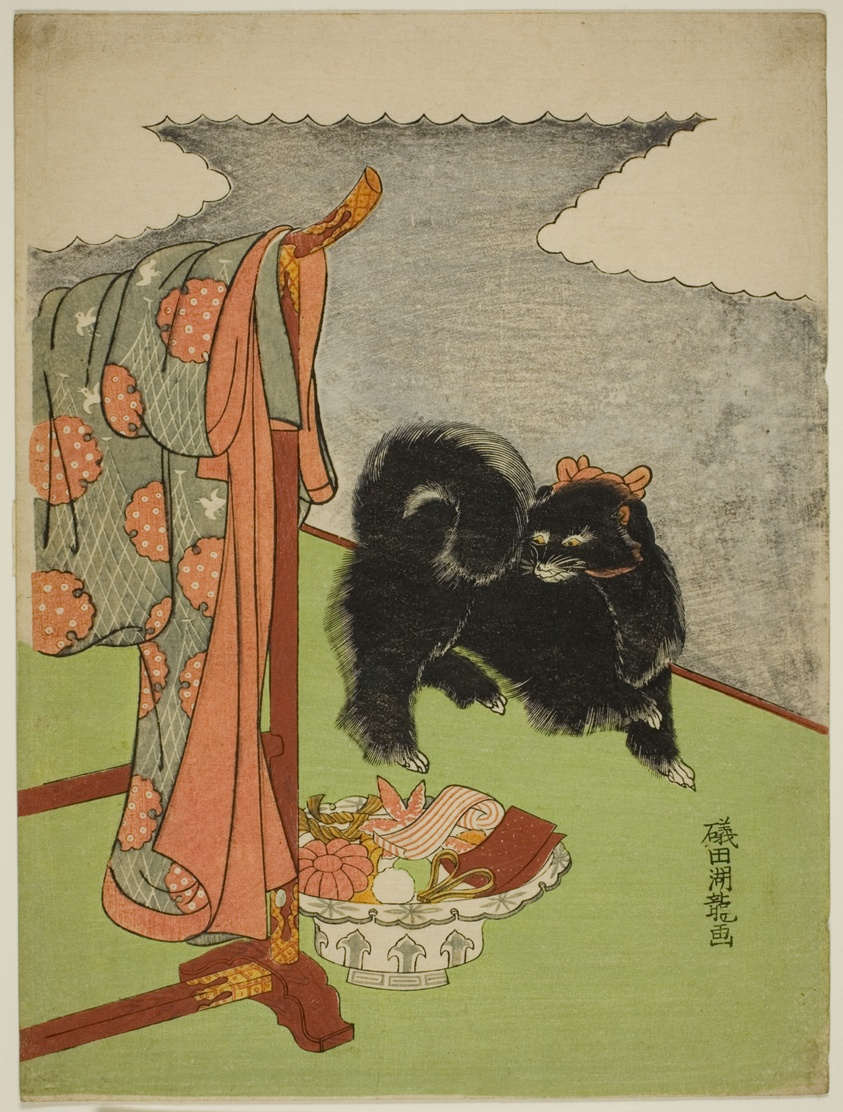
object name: Print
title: Black Dog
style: Japanese (culture or style)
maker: Isoda Koryusai (Japanese, 1735-1790)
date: c. 1772/81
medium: Color woodblock print; chuban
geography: Japan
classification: woodblock print; print; asian art